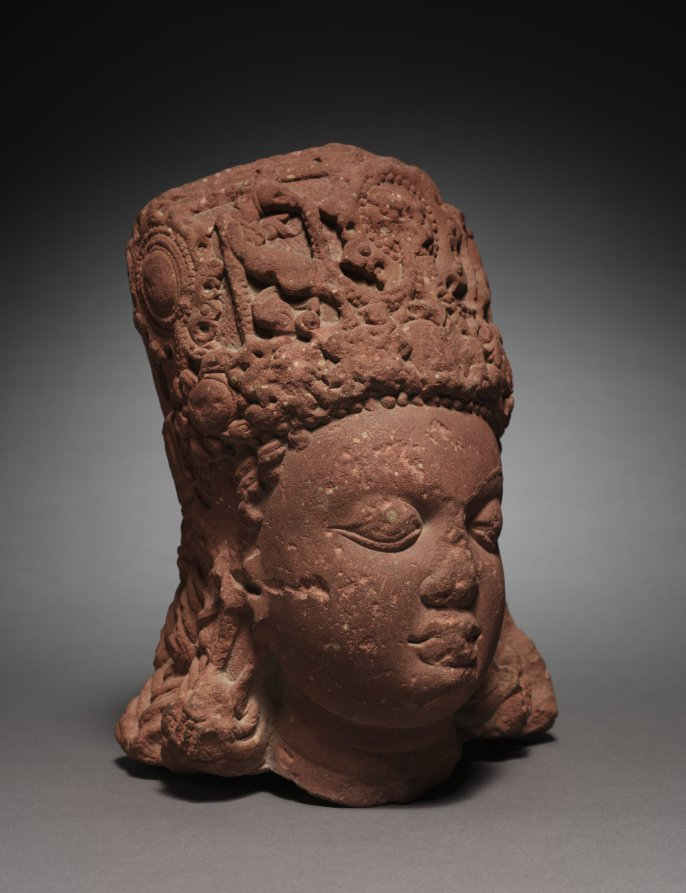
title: Head of Vishnu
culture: Northern India, Uttar Pradesh, Mathura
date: 400s CE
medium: sandstone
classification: Sculpture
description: During this period in India, the Hindu god Vishnu wears a distinctive squarish crown with a central medallion featuring a lion head. With strings of pearls issuing from his mouth, the imagery conveys the idea of radiance and glory. Devotees recognized Vishnu as having solar and royal attributes. His coiled ringlets of hair and heavy earrings also indicate that he was meant to have the appearance of a royal warrior.